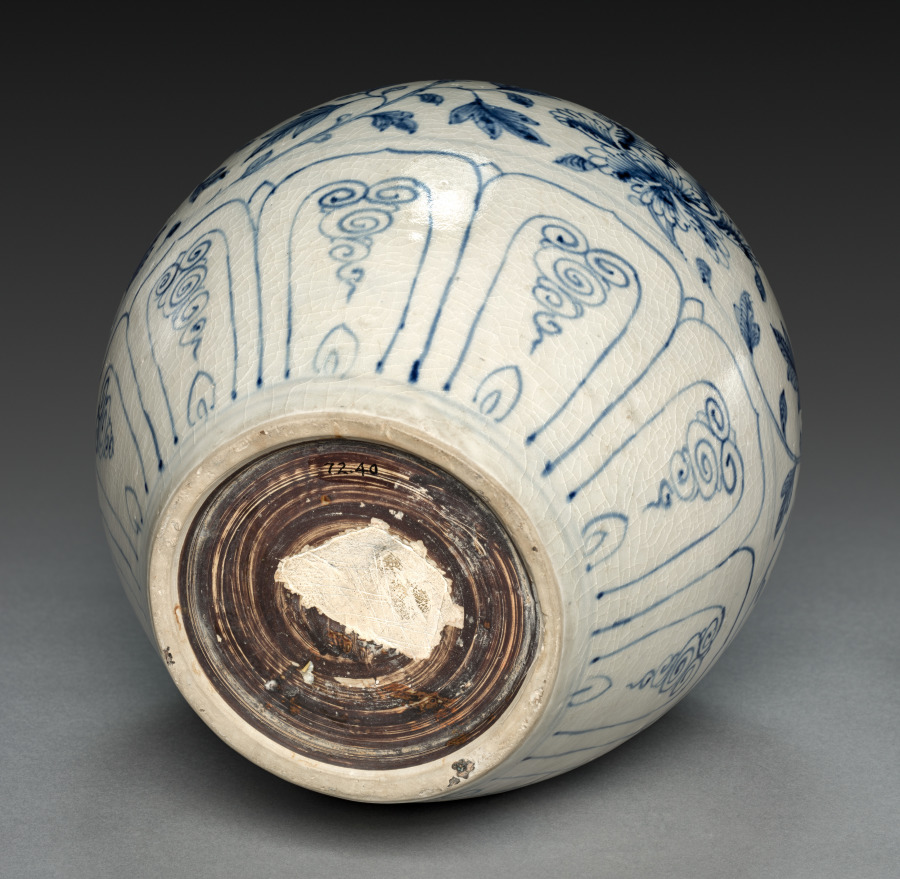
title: Storage Jar: Blue-and-White Ware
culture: Vietnam (Annam)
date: 1300s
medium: porcelain with underglaze blue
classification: Ceramic